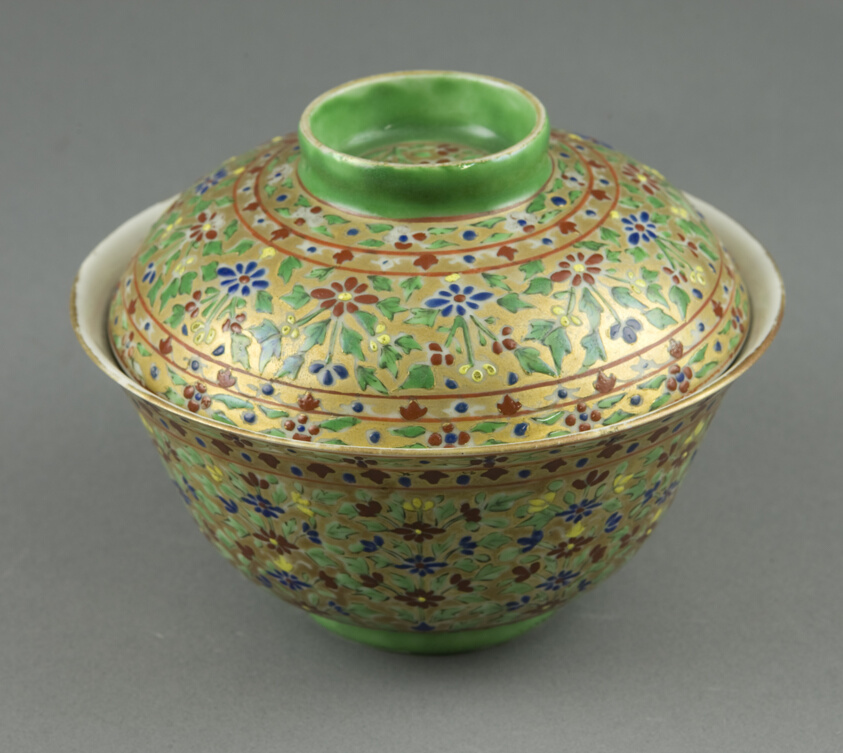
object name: Decorative Arts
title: Lai Nam Thong (Gold-Washed) Ware, Covered Bowl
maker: China, for the Thai Market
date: 19th century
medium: Porcelain painted with gilt in overglaze polychrome enamels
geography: China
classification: porcelain; asian art; ceramics; decorative arts